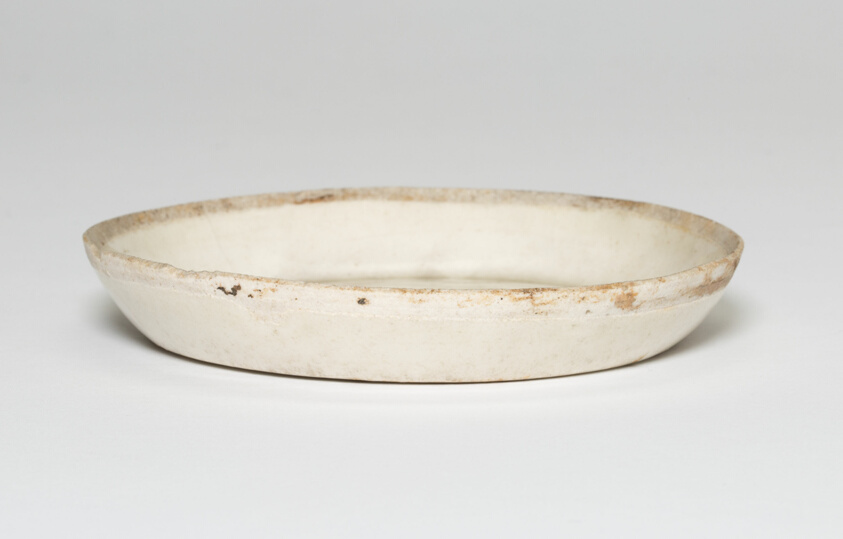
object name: Vessel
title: Saucer-Shaped Dish with Vegetal Scrolls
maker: China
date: Song dynasty (960–1279)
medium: Ding ware; stoneware with underglaze incised decoration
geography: China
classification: ceramics; asian art